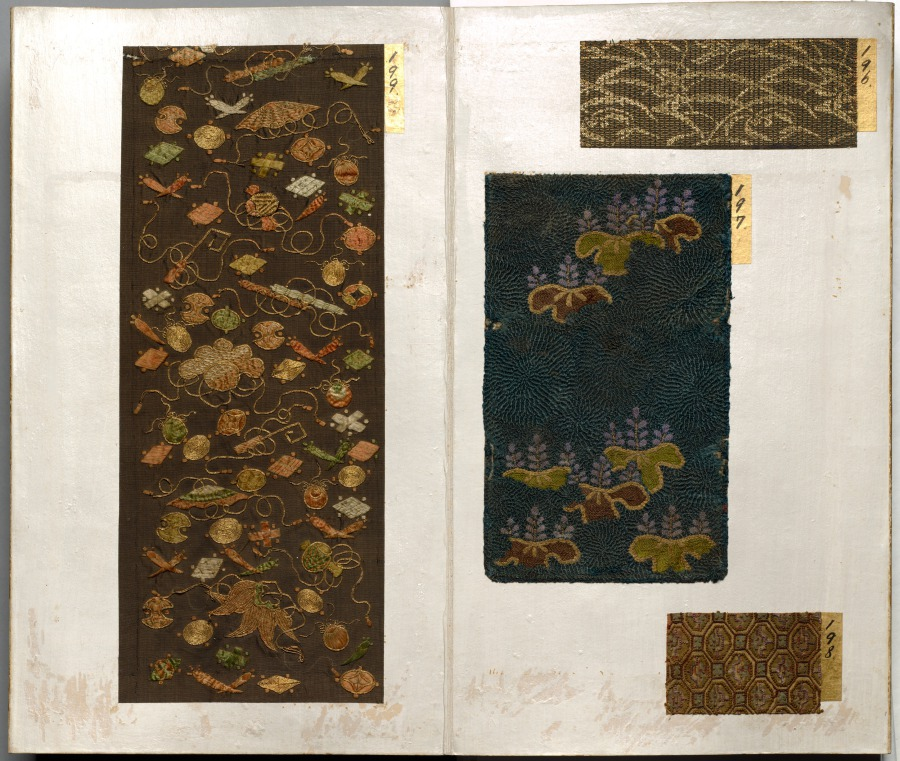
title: Album of Textile Samples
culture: Japan, Edo period (1615–1868)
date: 1600s-1700s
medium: silk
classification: Textile